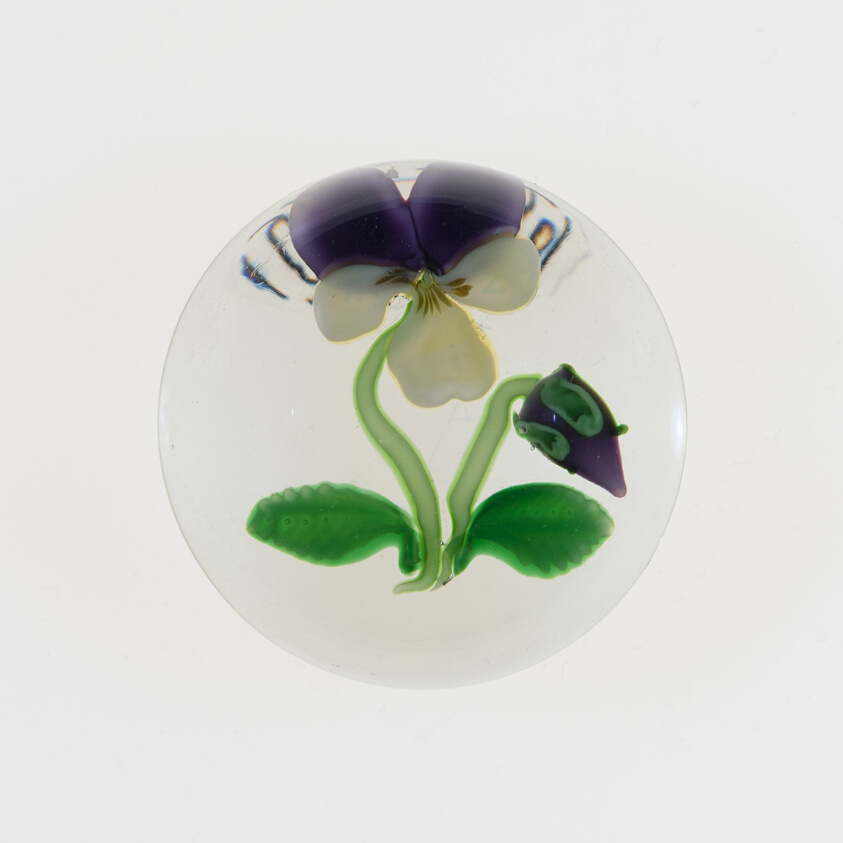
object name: Glass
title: Paperweight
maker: Clichy Glassworks (Cristalleries de Clichy); Clichy, France, 1837-1885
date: 19th century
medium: Glass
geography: Clichy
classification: paperweight; lampwork; european decorative arts; glass